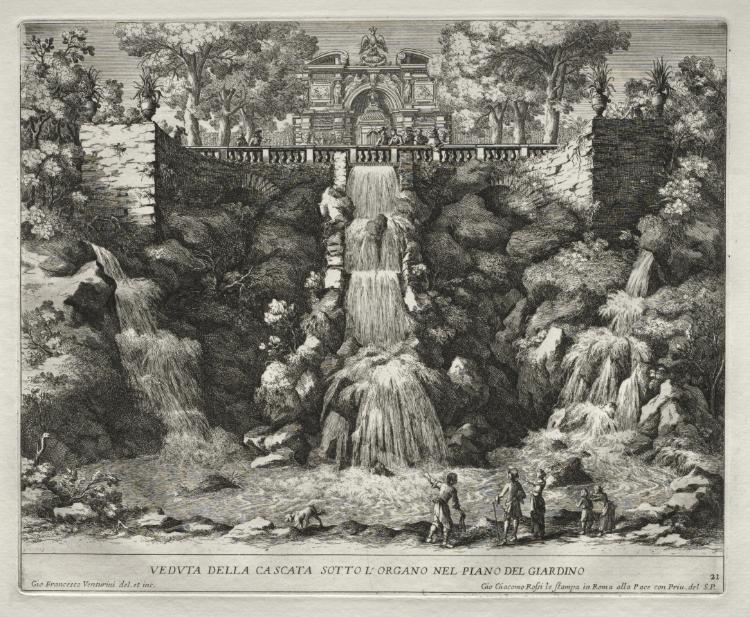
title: The Fountains of Rome (Le fontane di Roma), Book IV, plate 21: View of the Cascade below the Organ from the Garden (Veduta della Cascata Sotto L'Organo nel Piano del Giardino)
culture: Italy, 17th century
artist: Giovanni Francesco Venturini (Italian, 1650–1710)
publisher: Stamperia Giovanni Giacomo de Rossi (Italian, 1600–1750)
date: 1676–1700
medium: etching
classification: Print